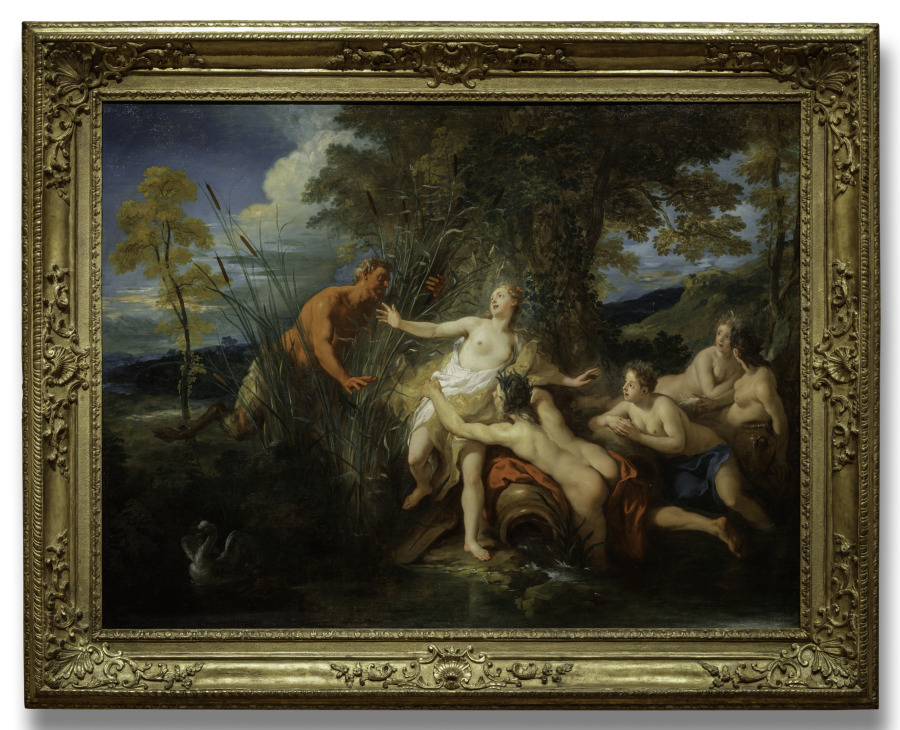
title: Pan and Syrinx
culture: France, 18th century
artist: Jean François de Troy (French, 1679–1752)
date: 1720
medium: oil on canvas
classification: Painting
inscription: Signed lower center: "De Troy 1720"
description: Subjects drawn from classical mythology posed a challenge for painters: they demanded skill in depicting the human body in complex poses, as well as knowledge of ancient texts and an ability to interpret them imaginatively. Jean François de Troy’s rich colors and voluptuous figure types were ideal for depicting the sorts of mythological subjects favored by his elite patrons, which generally focused on themes of love. In a myth recounted in the Roman poet Ovid’s Metamorphoses, the nymph Syrinx fled from the lecherous advances of the god Pan. Trapped at the edge of a river, she begged for a way to escape, and the gods transformed her into reeds. Pan later gathered these reeds to form the pan pipes, the musical instrument forever associated with him.